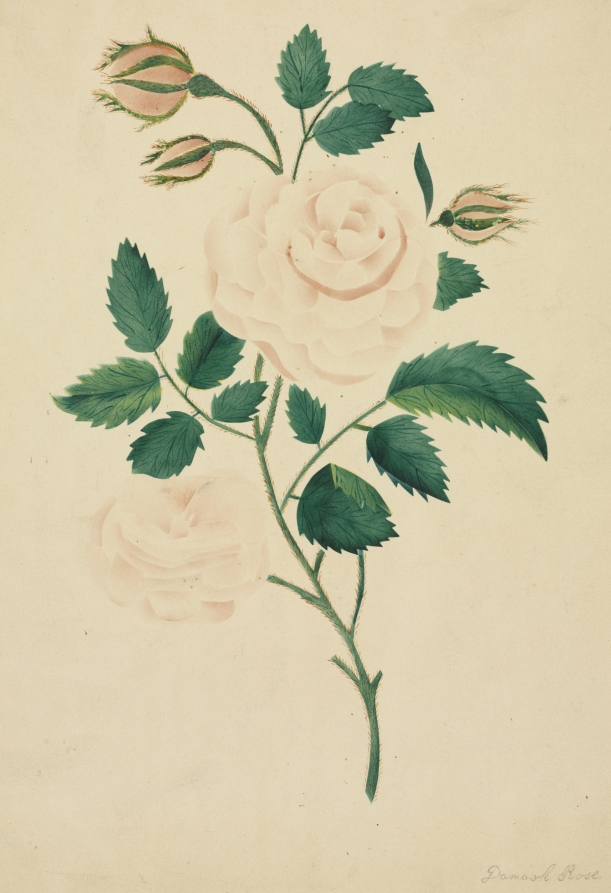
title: Damask Rose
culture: America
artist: Mary Altha Nims (American, 1817–1907)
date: 1800s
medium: watercolor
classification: Drawing